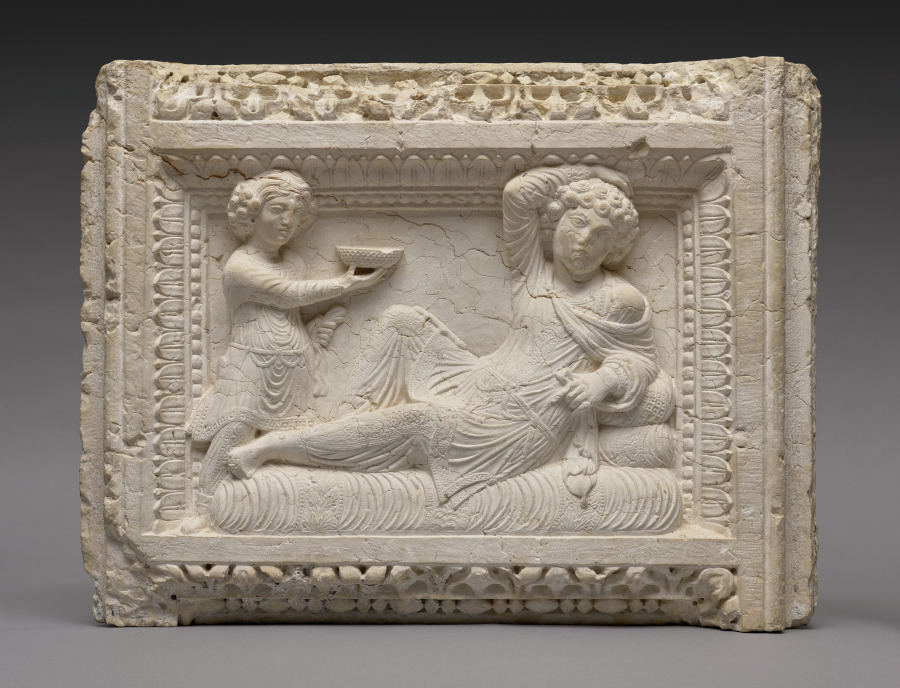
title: Tomb Relief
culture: Syria, Palmyra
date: 230 CE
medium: limestone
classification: Sculpture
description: Although its findspot is unknown, this high relief almost certainly once sealed a burial niche of a mausoleum at Palmyra. It illustrates a blending of Roman and Parthian artistic traditions. Set within a sumptuous border of beads and leaves, a wealthy man awakens on a luxuriously cushioned bed as his attendant offers him a wine bowl decorated with crosshatchings. Both are dressed according to Parthian custom, wearing pants and pleated tunics, but the man’s languid pose is taken from classical prototypes. The subject is a variant of a formulaic funerary banquet scene in which proffered wine welcomes the deceased into a well-appointed afterlife.